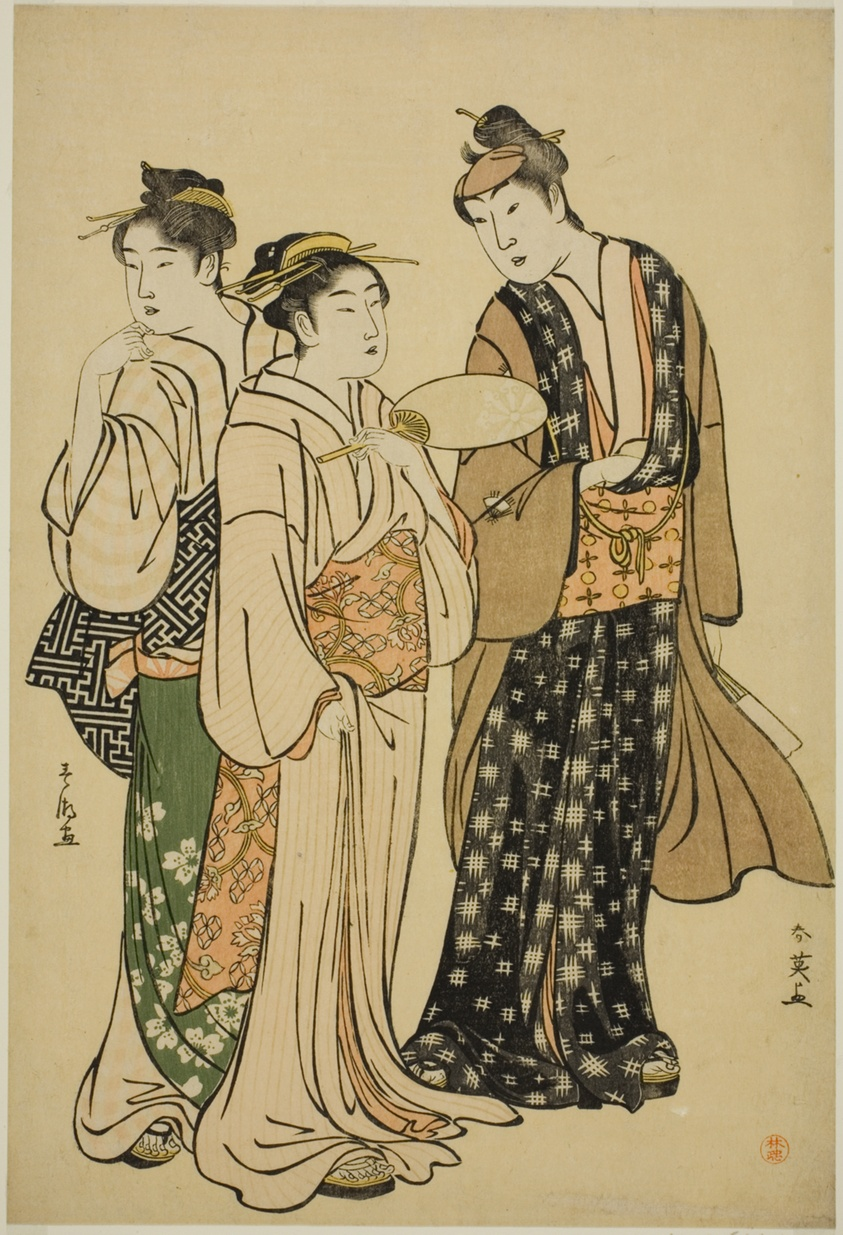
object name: Print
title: The Actor Iwai Hanshiro IV in Street Attire (by Shun'ei) Conversing with Two Women (by Shuncho)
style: Japanese (culture or style)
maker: Katsukawa Shun'ei; Japanese, 1762-1819; Katsukawa Shuncho; Japanese, active c. 1780-1801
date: c. 1788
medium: Color woodblock print; aiban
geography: Japan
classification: woodblock print; print; asian art